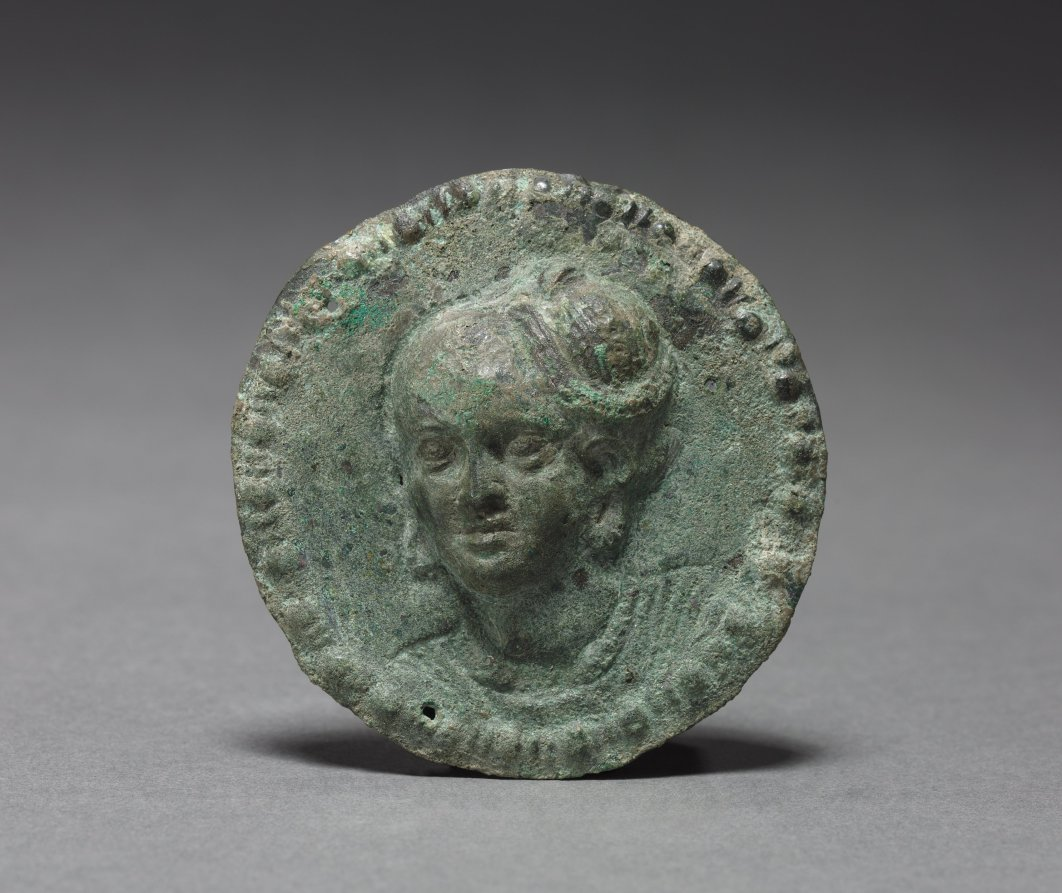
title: Roundel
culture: India, Satavahana period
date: c. 100–1 BCE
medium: bronze with repoussé and chased designs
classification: Sculpture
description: The form of a medallion with a figural bust and bead-and-reel border indicates the artist’s familiarity with Greco-Roman objects. The figure itself, however, is Indian, with voluminous, coiled coiffures and prominent jewelry. This object was probably worn as an ornament on a belt or girdle.